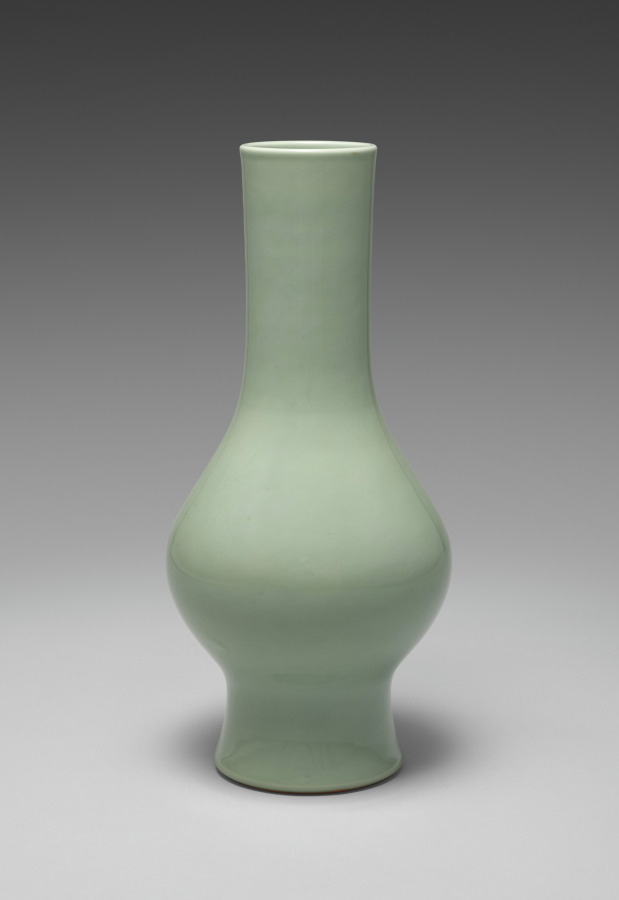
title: Flower Vase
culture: Japan, Meiji period (1868–1912)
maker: Seifū Yohei III (Japanese, 1851–1914)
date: 1912–14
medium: Porecelain with green glaze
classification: Ceramic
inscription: The vase's box lid identifies the vase as hisokuyō (C. mise yao 秘色窯), or “mysterious color ware,” style.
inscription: 清風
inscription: 清風制之 【印】帝室技芸員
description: This flower vase has a tall, slightly flared foot and bulbous body with a slimmer neck. It is completely undecorated but for the hisoku, or “mysterious color,” glaze. Its box lid has a red seal with a flower on it, a rather unusual feature also seen on the box for the green-glazed water container that belonged to the Hosokawa family (see CMA 2022.197).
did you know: The vase's box lid identifies the glaze as hisoku 秘色 or “mysterious color.”